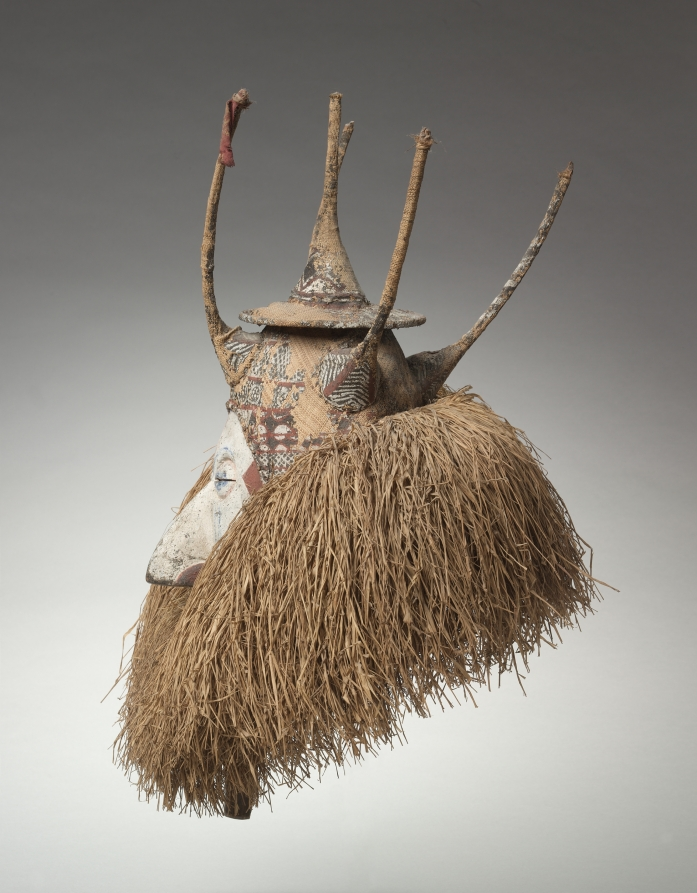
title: Mask (ndeemba)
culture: Africa, Central Africa, Democratic Republic of Congo, Yaka-style carver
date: early 1900s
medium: Wood, raffia, paint, and cotton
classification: Mask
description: This Mask (Ndeemba) has been featured prominently in the African galleries since making its debut at the Cleveland Museum of Art in 1962. Dated to the 1900s, the object is part of a group of eight masks that appear at the end of the circumcision and puberty ritual (n-khanda) for Yaka boys. It would have marked the new status of the boys who became men and commemorated their re-entry into the village. Affirming age-long tradition, such masks are worn by the master of the initiation or by the newly initiated himself.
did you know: Look under the fluffy layers of raffia fiber to see the handle; this mask was "worn" by holding it up to the face.